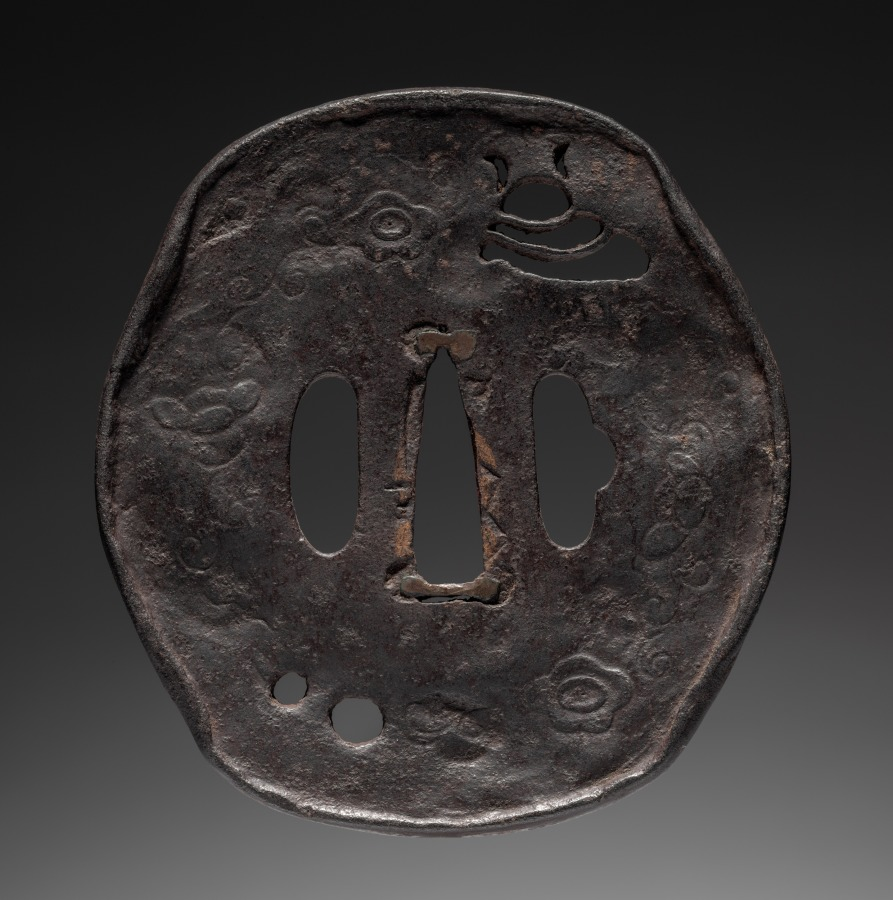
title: Sword Guard (Tsuba)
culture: Japan, possibly Edo period (1615-1868)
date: c. 1615–1868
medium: iron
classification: Arms and Armor